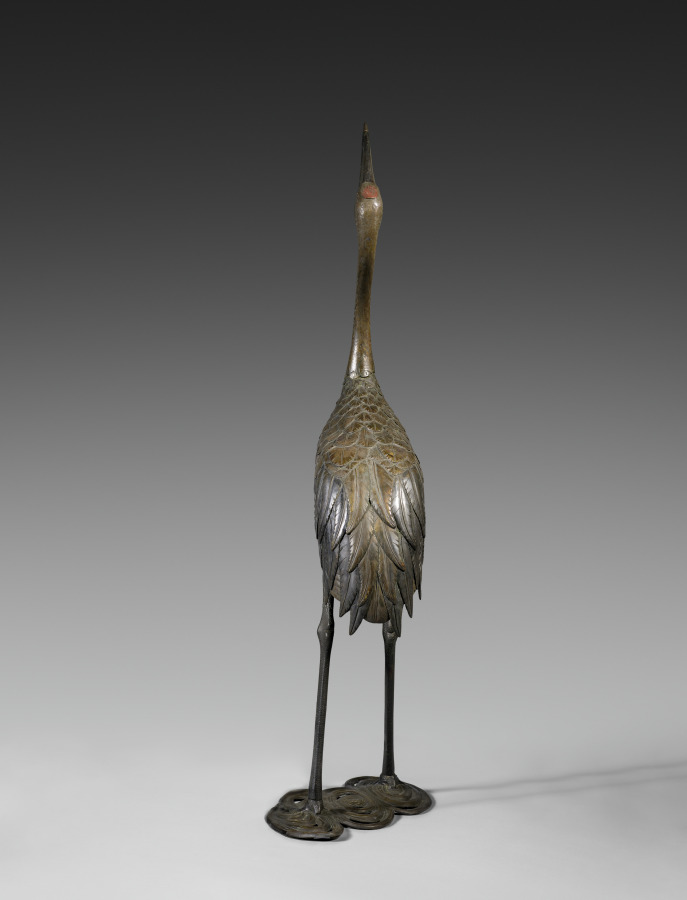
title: Crane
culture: Japan, Taishō period (1912–26) to Shōwa period (1926–89)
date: early to mid-1900s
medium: bronze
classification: Sculpture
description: This crane stands in water swirling around its feet, suggesting that it may have been intended for an interior setting without real water. Cranes symbolize longevity in East Asia, where they are said to live a thousand years. Representations of cranes are found across the centuries in cast metal form in Japanese religious settings. They are depicted as surface motifs on sacred objects, such as ritual mirrors, or as crane-shaped ornaments or incense burners. In the modern era, metal animals were made as sculptural works of art or as decorative objects for gardens.